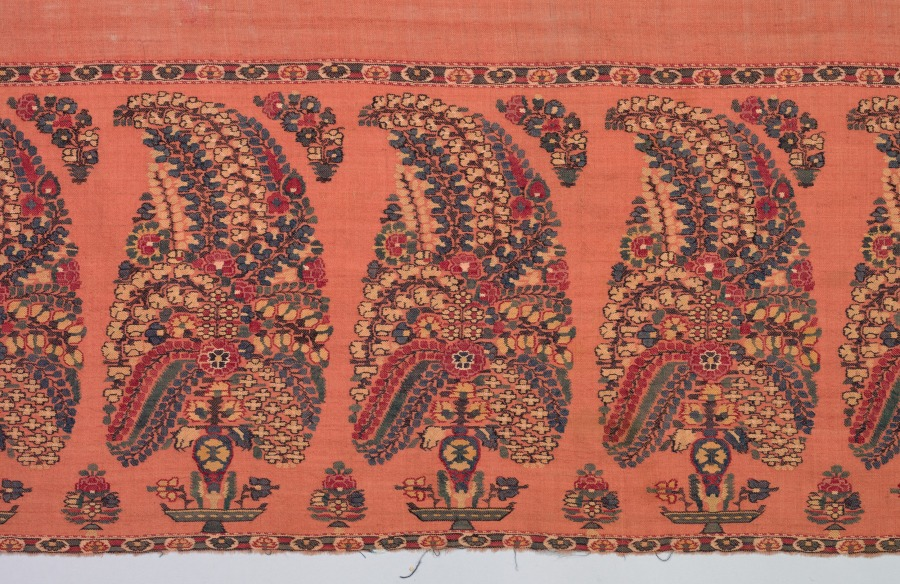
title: Apricot Long Shawl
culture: India, Kashmir, Afghan period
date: 1785–1800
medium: 2/2 twill tapestry weave, double interlocked; wool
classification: Textile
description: Artistic styles evolved with increasingly elaborate mosaic-like decoration during the 1800s to meet an insatiable European demand. Early shawls had plain fields with isolated plants in the end panels, which led to decorated side borders and vases of blossoming stems. Such flora was replaced by colorful, dense blossoms forming cone-shaped botehs, or paisleys, on trays. To this was added a gallery of small botehs and angular floral vines around a rich blue field with single botehs in the corners. Lightweight, supple, warm, and colorful, Kashmir shawls had no equal. Fine, soft goat-hair wool was woven in a 2/2 twill tapestry weave—the equivalent of painting with colored weft threads. Imitations woven in Paisley, Scotland, prompted the popular term paisley.